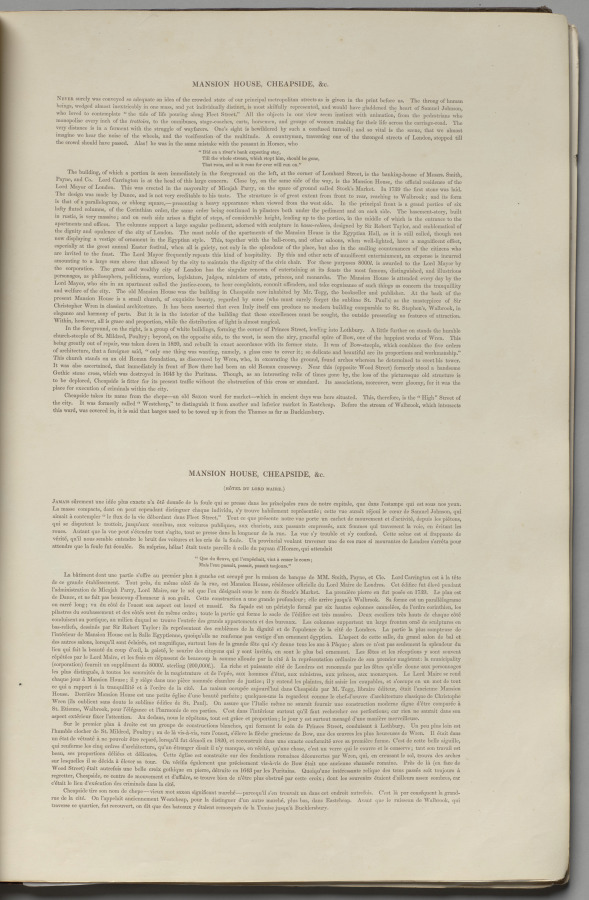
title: London As It Is: Mansion House, Cheapside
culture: England, 19th century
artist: Thomas Shotter Boys (British, 1803–1874)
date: 1842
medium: lithograph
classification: Bound Volume